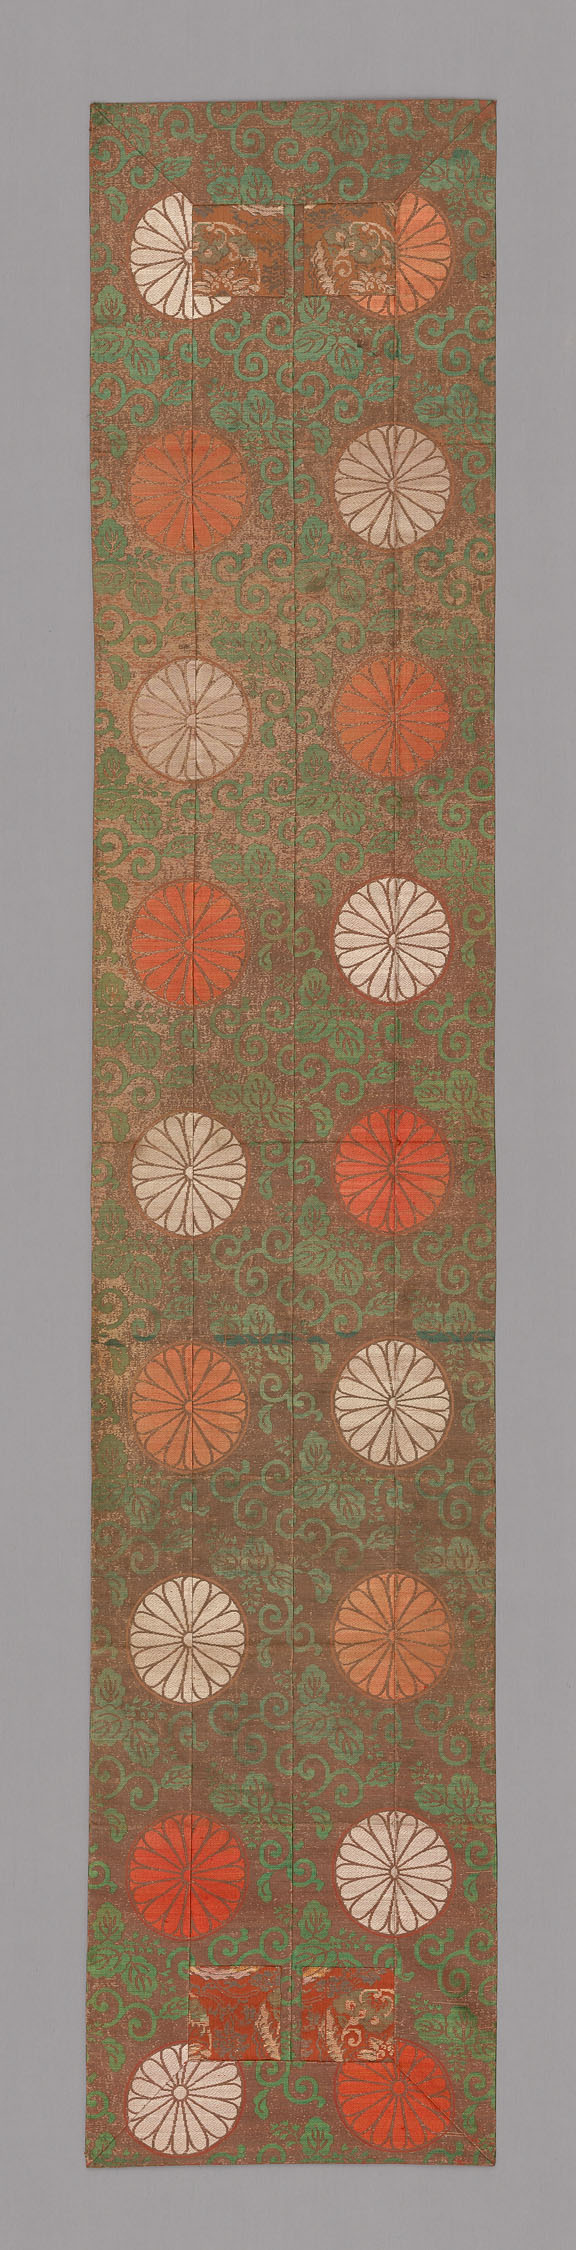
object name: Textile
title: Ôhi (Stole)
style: late edo, Japanism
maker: Japan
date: late Edo period (1789–1868), 1801/25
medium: Silk and gold-leaf-over-lacquered-paper-strips, warp-float face 2:1 'Z' twill weave with weft-float faced 1:2 'Z' twill interlacing of secondary binding warps and supplementary patterning wefts; patches: silk, warp-float faced 4:1 satin weave with weft-float faced 1:2 'Z' twill interlacings of secondary binding warp and supplementary patterning wefts; lined with silk, plain weave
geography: Japan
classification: textile; weaving